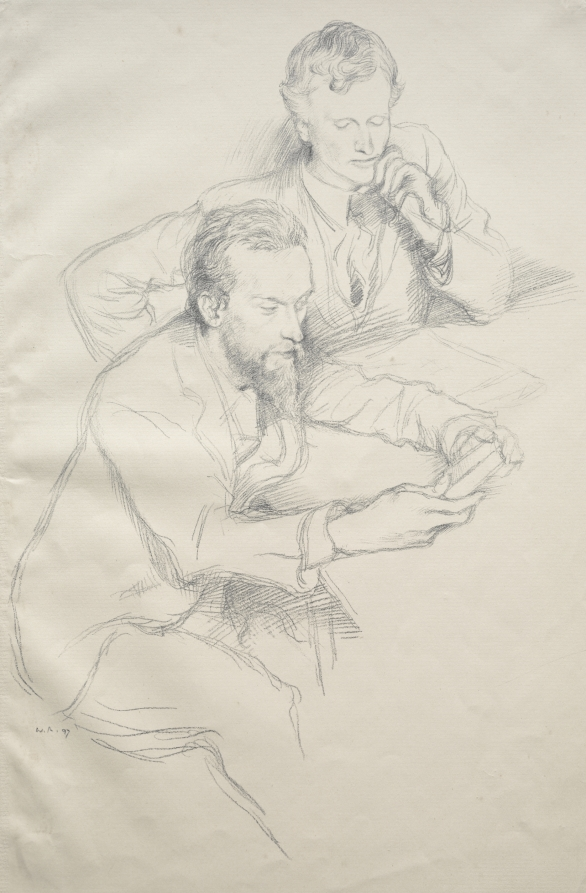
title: Ricketts and Shannon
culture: England, 20th century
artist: William Rothenstein (British, 1872–1945)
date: 1897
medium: lithograph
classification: Print